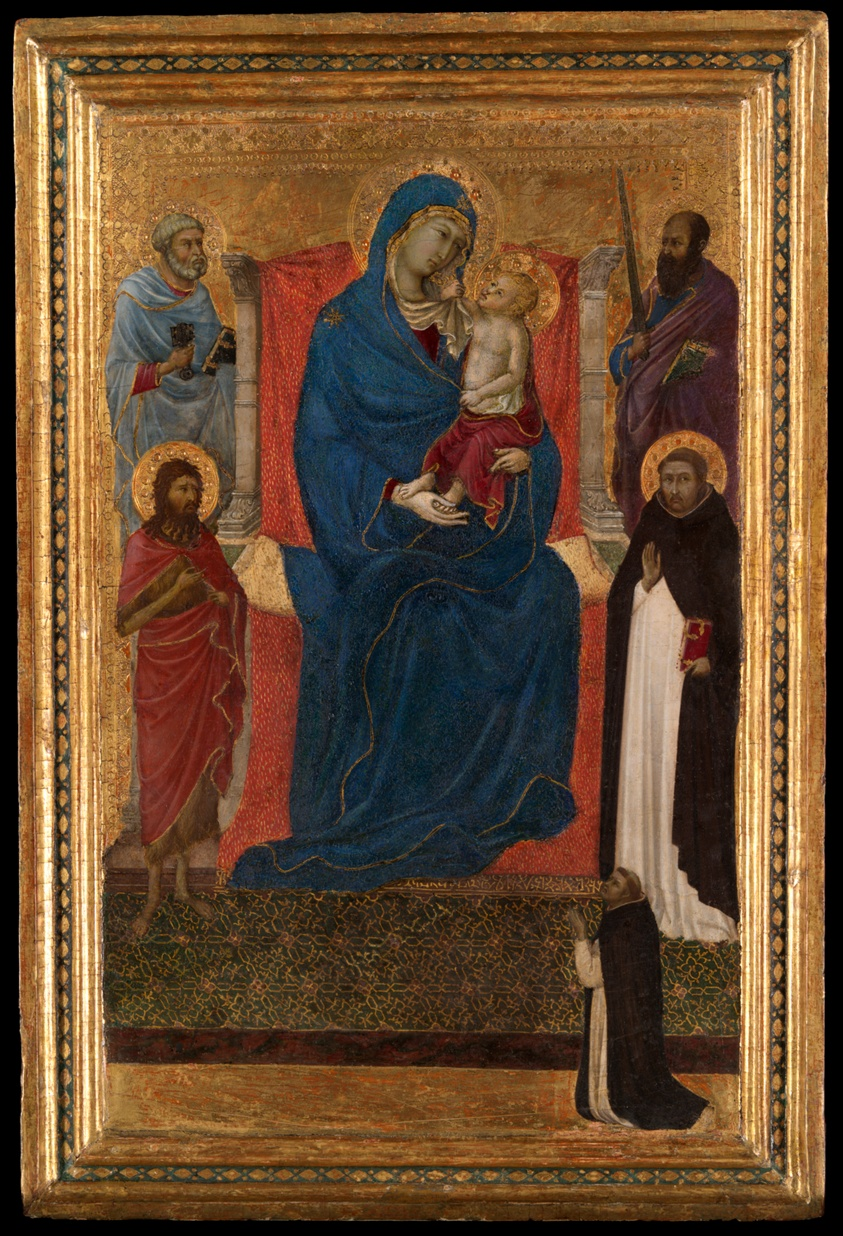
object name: Painting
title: Virgin and Child Enthroned with Saints Peter, Paul, John the Baptist, and Dominic and a Dominican Supplicant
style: 14th century, medieval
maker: Attributed to Ugolino di Nerio (Italian, active 1317–1339/49)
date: 1325/35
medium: Tempera on panel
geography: Italy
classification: tempera; paint; Italian; painting; european painting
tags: Virgin and child/Madonna and child, Virgin Mary, Throne, saints, Saint John the Baptist, religious scenes, religious figures, religious attire, religious, religion, mothers, mother and child, mother, men, Madonna, Jesus, family, families, Devotion, Christianity, Christian subjects, children, book, blue (color), blue, bibles, babies, Century of Progress, world's fairs, Chicago World's Fairs